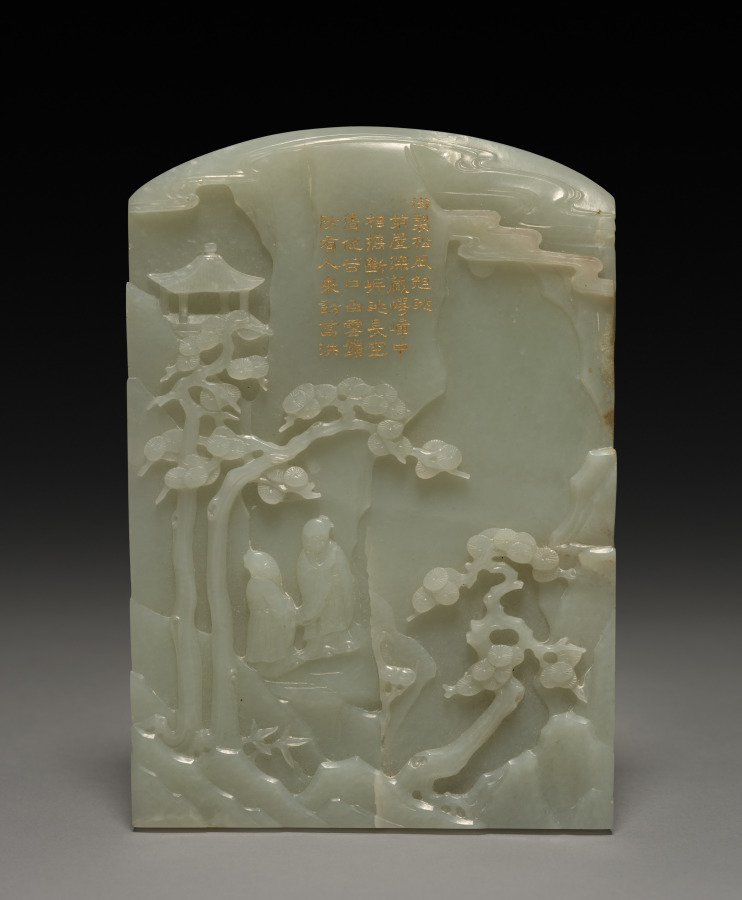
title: Table Screen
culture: China, Qing dynasty (1644–1911), Qianlong reign (1736–95)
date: 1736–95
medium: jade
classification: Jade